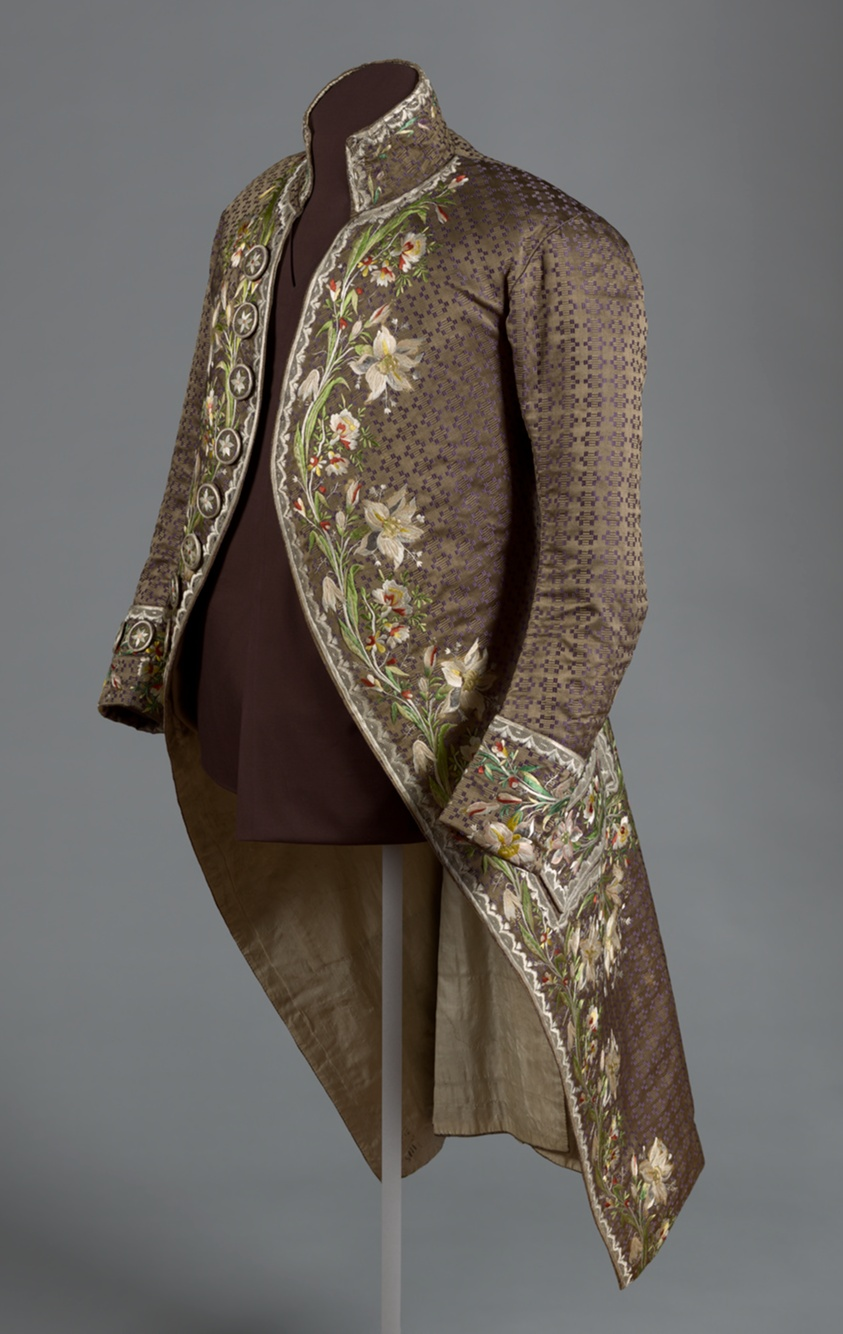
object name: Costume and Accessories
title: Man's Coat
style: 18th Century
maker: France, possibly Lyon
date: 1780s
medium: Silk, compound weave foundation; embroidered with silk threads in satin, stem and straight stitches; French knots, needle lace fillings, and slanted satin border block shading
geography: France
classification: textile; needlework (visual works); costume; dress (garment); clothing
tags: fashion, floral motifs, flowers